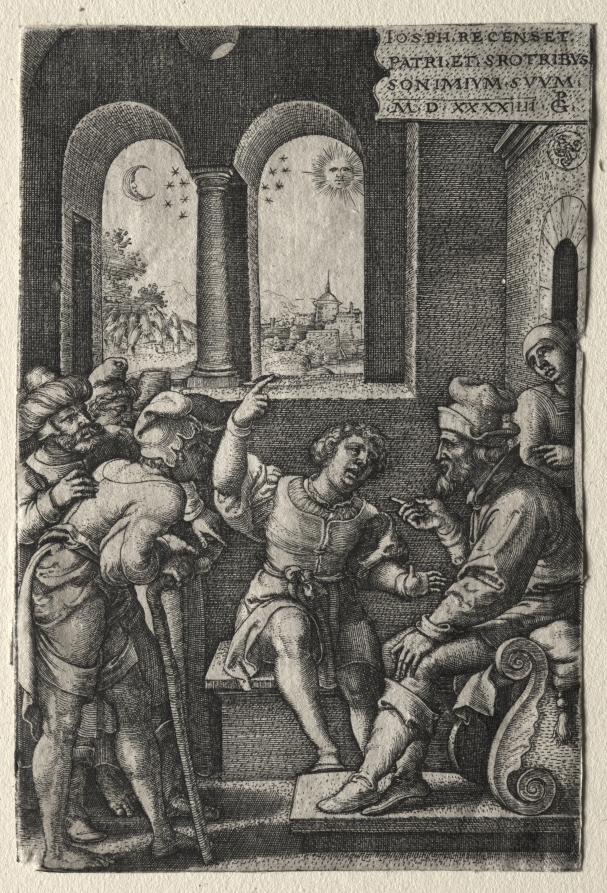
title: The Story of Joseph: Joseph Recounting his Dreams to his Father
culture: Germany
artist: Georg Pencz (German, c. 1500–1550)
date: 1544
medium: engraving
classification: Print